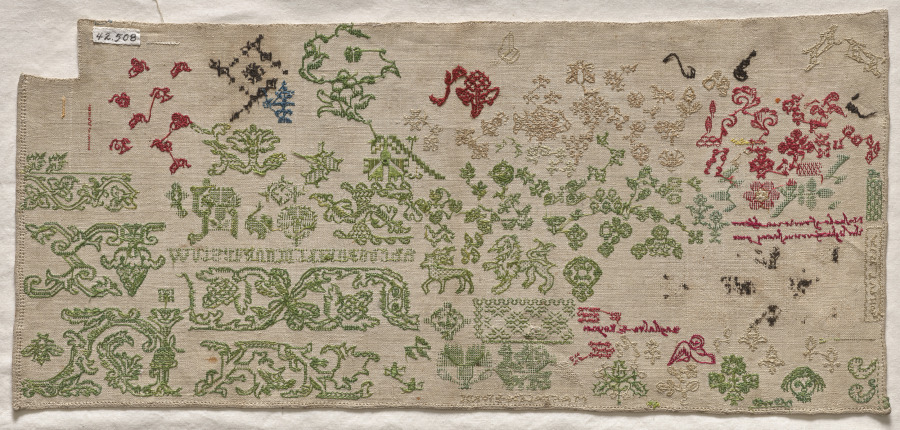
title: Sampler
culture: England, 17th century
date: 1600 – 1630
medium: embroidery: silk on linen tabby ground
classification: Sampler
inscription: alphabet through W; "Alse Turnor"; "Magdalen + Kuynet"; "Madgalen Forde"; and the verse: "No shade of envie can obscure the light of vertue shining pure."`